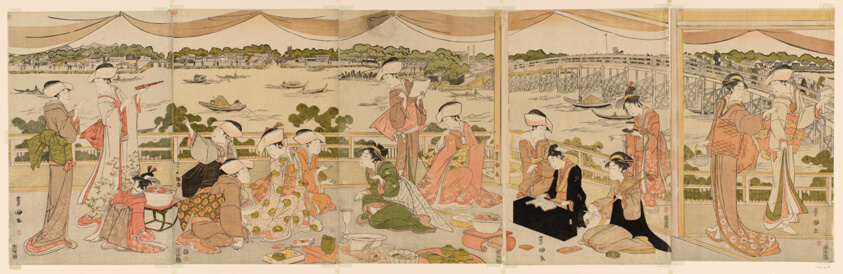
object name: Print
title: Recital on a verandah overlooking Sumida River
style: Japanese (culture or style)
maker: Utagawa Toyokuni I 初代 歌川 豊国; Japanese, 1769–1825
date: c. 1790/95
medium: Color woodblock print; oban pentaptych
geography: Japan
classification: woodblock print; print; asian art